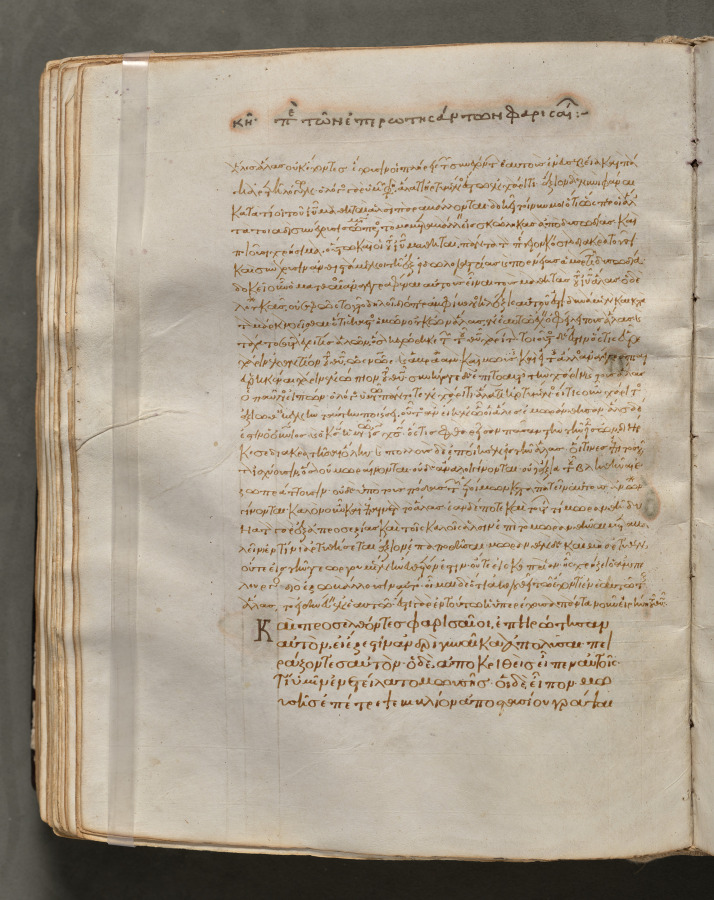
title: Text, folio 167 (verso), from a Gospel Book with Commentaries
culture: Byzantium, Constantinople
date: c. 1000–1100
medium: ink, tempera, and gold on vellum; leather binding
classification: Bound Volume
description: Each of the four gospels in this book opens on a page with brilliantly illuminated borders depicting the author of the text as well as birds-principally peacocks, symbols of the immortality of the soul-and fountains, representing the fountain of life and the salvation of the soul. This volume consists of 428 leaves with texts in Greek. Its level of sophistication suggests that it was probably written and decorated in a monastery in Constantinople.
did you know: Gospel Books were carried in procession through Byzantine churches.